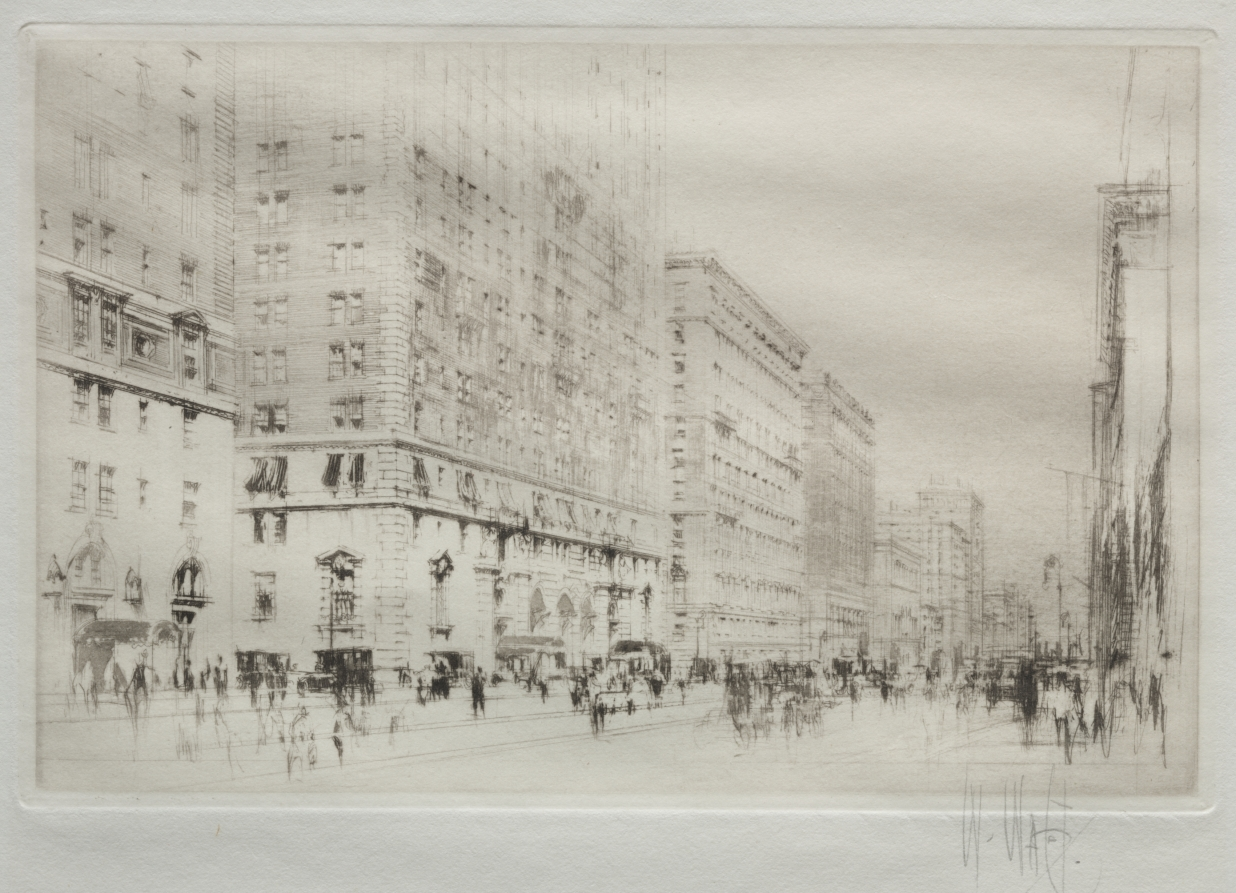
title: Park Avenue, New York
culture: England, 20th century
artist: William Walcot (British, 1874–1943)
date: 1923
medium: drypoint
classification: Print